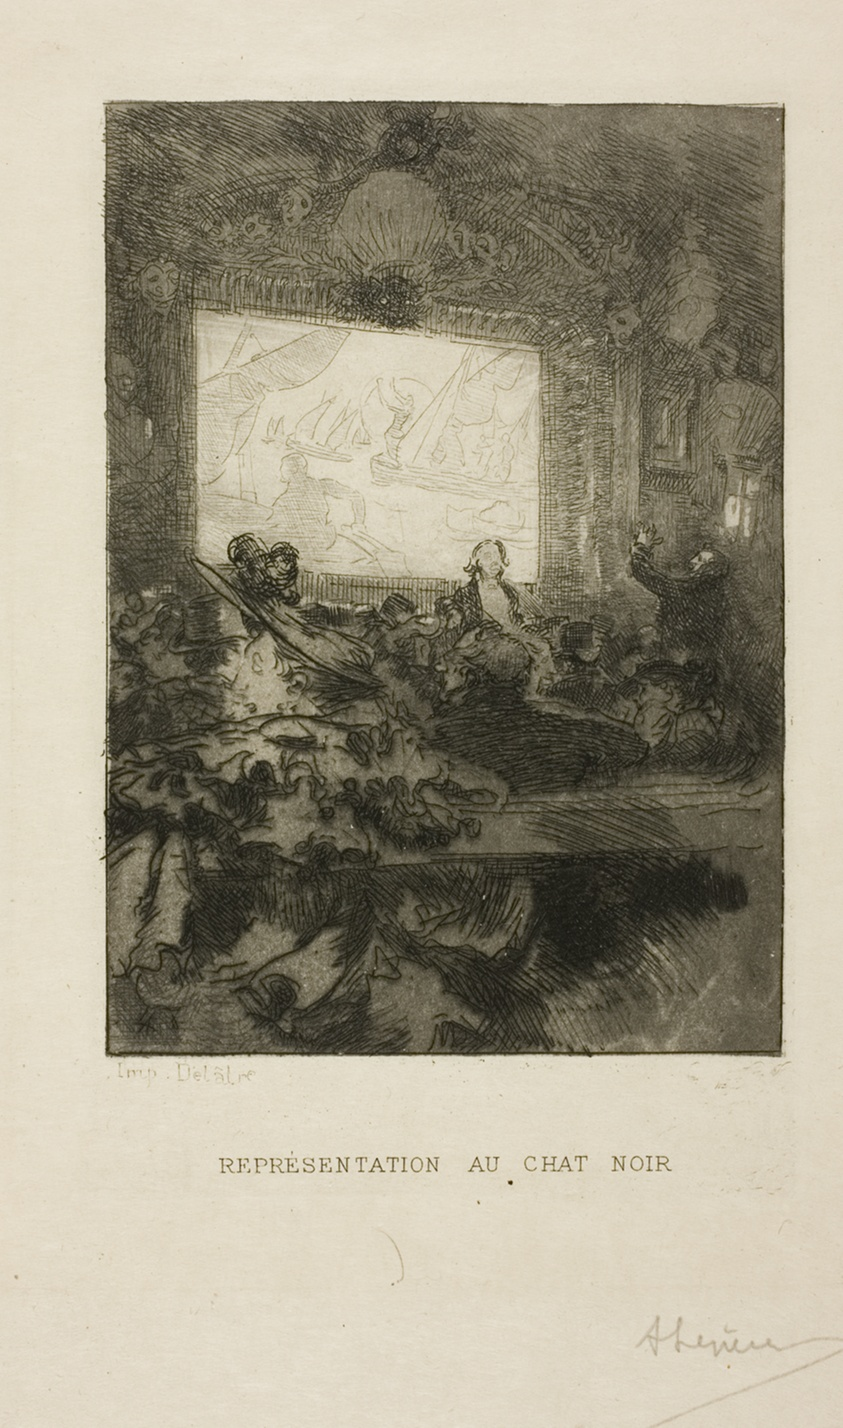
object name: Print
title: At the Chat Noir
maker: Louis Auguste Lepère (French, 1849-1918)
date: 1893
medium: Etching and aquatint on cream wove paper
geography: France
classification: etching; print; prints and drawing